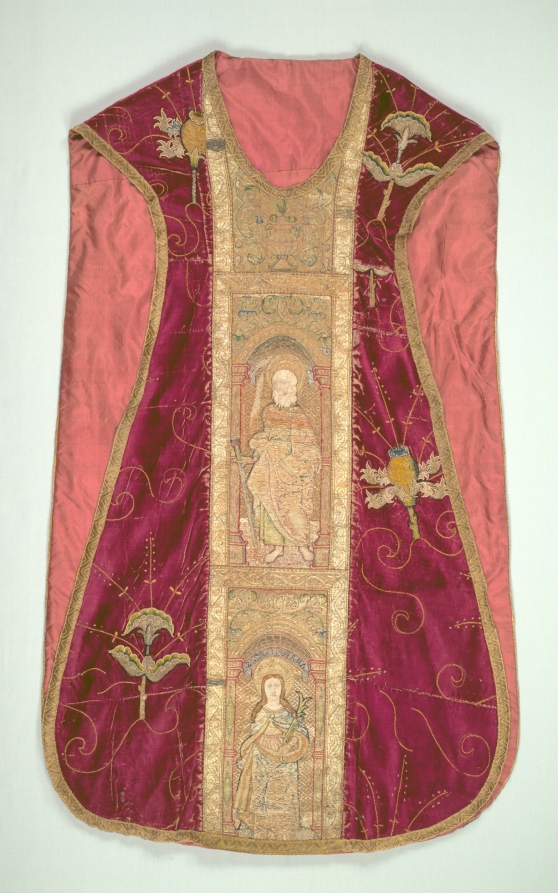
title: Chasuble with Orphrey Band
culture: England, London (embroidery) and Italy, Florence (velvet), early 16th century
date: 1500–1520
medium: Silk, gold thread, sequins; appliqué, embroidery: couching stitches Velvet: solid pile, silk; embroidery: or nué (shaded gold)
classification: Embroidery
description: The English adopted a simpler style of embroidering vestments suitable for mass production around 1500. Isolated motifs, often floral, were embroidered on plain velvet, as in this ecclesiastical chasuble. The orphrey, or embroidered band, in the center depicts Saints Peter, John the Evangelist, and Andrew, identified by their names and attributes (top to bottom). Most of the surface is covered with gold thread sewn down by silk thread passing over it in different densities to create the effect of modeling. Silk thread was also used to embroider areas of skin and hair (mostly disintegrated).